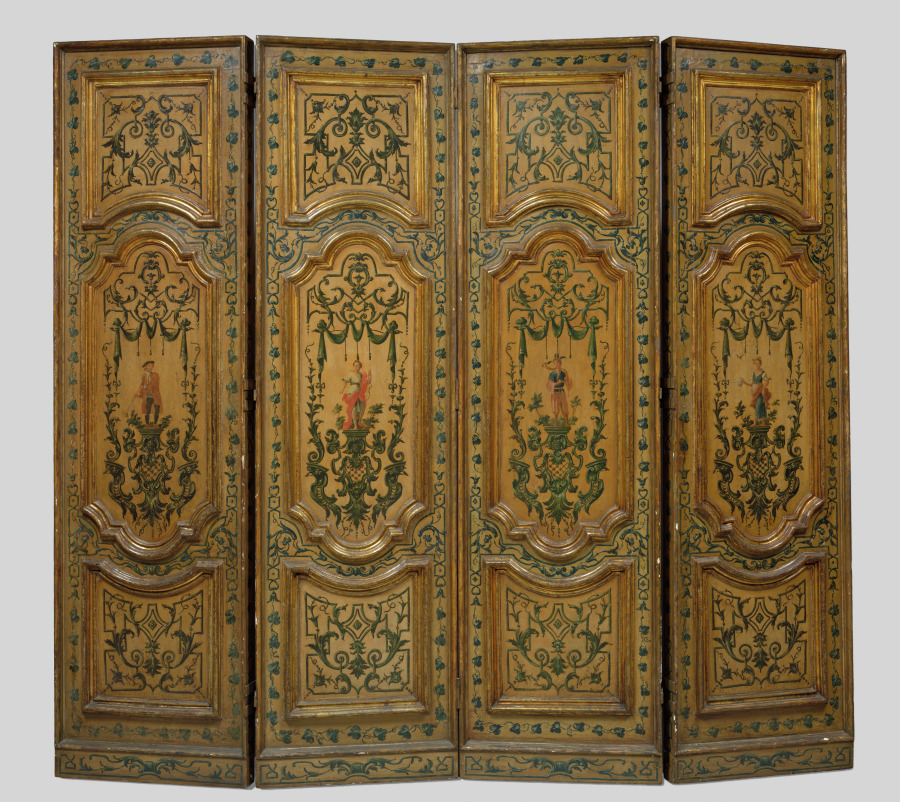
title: Four Door Panels Adapted as a Screen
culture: Italy, Florence or Luca, early 18th century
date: early 1700s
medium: painted decoration on wood; moldings, gold leaf on silver leaf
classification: Furniture and woodwork